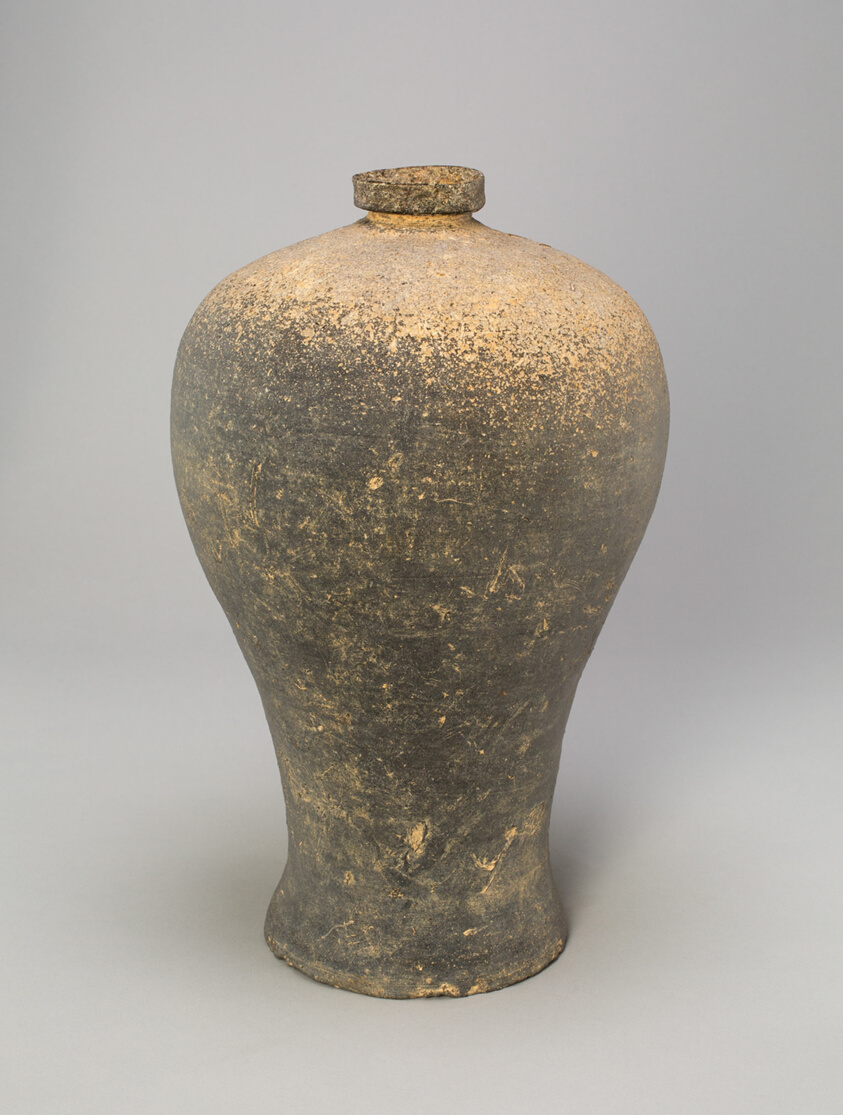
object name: Vessel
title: Bottle-Shaped Vase (Maebyong)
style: Korean (culture or style)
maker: Korea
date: Goryeo dynasty (918–1392), late 11th/early 12th century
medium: Stoneware with natural ash glaze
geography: Korea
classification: vase; vessel; stoneware; ceramics; asian art